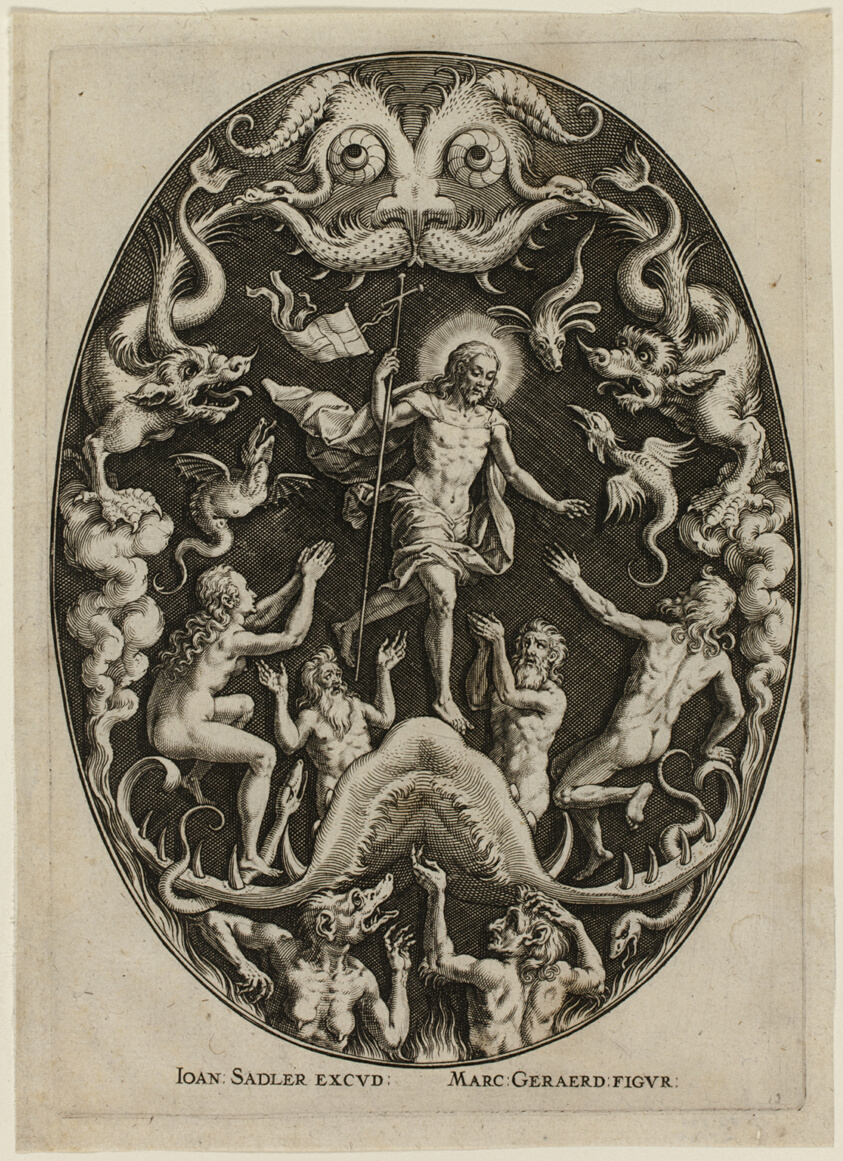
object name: Print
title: Christ in Limbo, from Passion of Christ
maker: Jan Sadeler, the Elder (Flemish, 1550-1600); after Marcus Gheeraerts, the Elder (Flemish, c. 1520-c. 1590)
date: 1575/1600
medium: Engraving in black on ivory laid paper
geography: Flanders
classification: engraving; print; prints and drawing